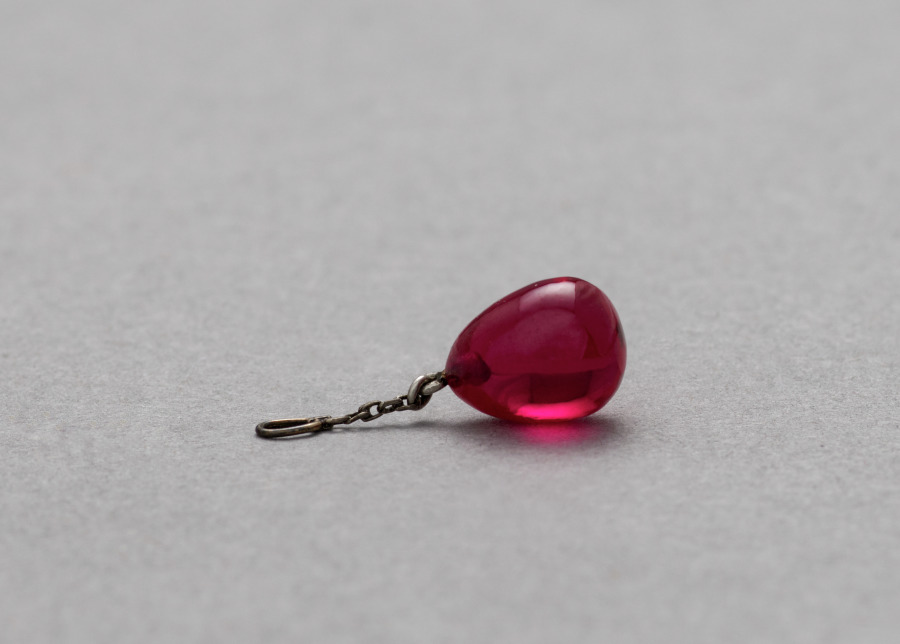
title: Ruby or Pink Sapphire Surprise from the Lapis Lazuli Easter Egg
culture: Russia, St. Petersburg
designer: attributed to Peter Carl Fabergé (Russian, 1846–1920)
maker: attributed to House of Fabergé (Russian, 1842–1918)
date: c. 1885–90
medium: gold, enamel, lapis lazuli, pearls, diamonds, rubies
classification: Miscellaneous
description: This Easter egg, like the subsequent ones produced by Fabergé for the imperial family, contains a surprise when opened. In this case, the egg opens to display a yellow enameled cover, resembling an egg yolk, which then opens to reveal a tiny replica of the Russian imperial crown, containing either a ruby or a pink sapphire suspended on a chain.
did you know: This tiny ruby or pink sapphire dangles from a diamond encrusted crown surprise, which is a replica of the Russian imperial crown made for Empress Catherine the Great in the 1700s.